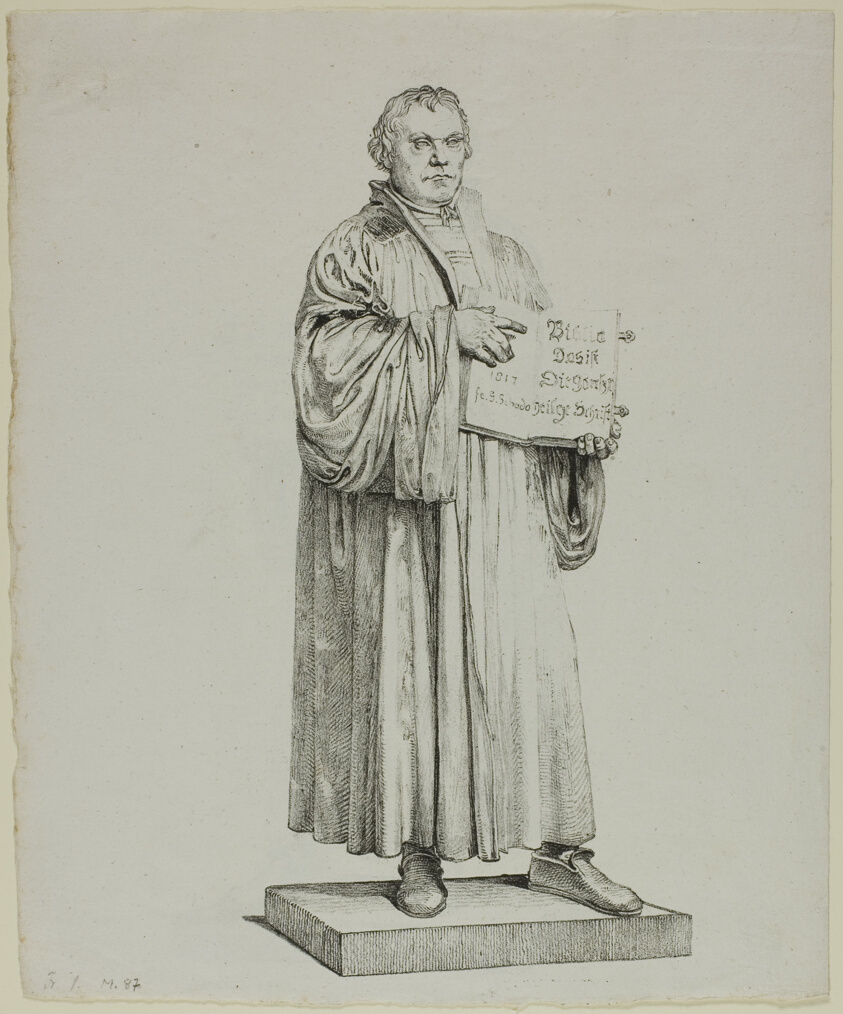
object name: Print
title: Luther's Statue in Wittenberg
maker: Johann Gottfried Schadow (German, 1764-1850)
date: 1822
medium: Lithograph on paper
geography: Germany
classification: etching; print; prints and drawing